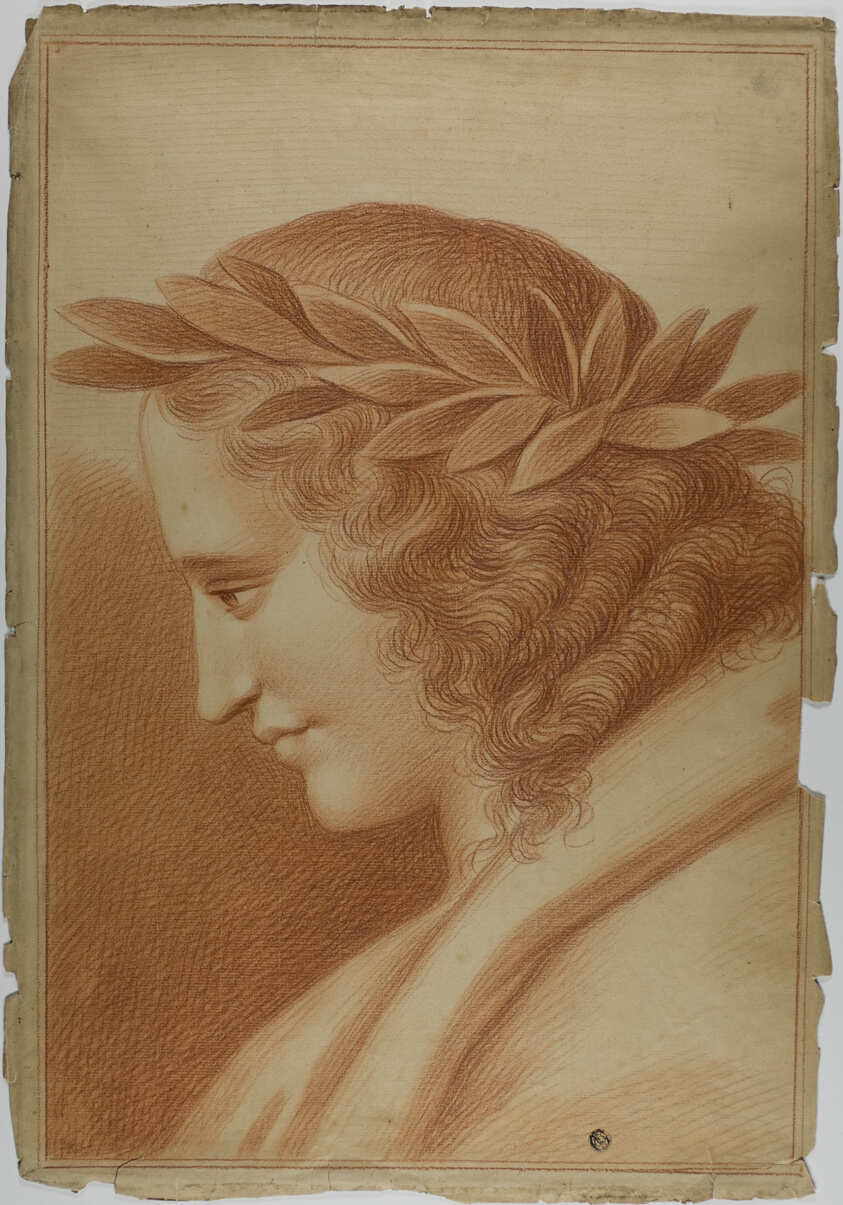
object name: Drawing and Watercolor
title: Poet Crowned with Laurel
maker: After Raffaello Sanzio, called Raphael; Italian, 1483-1520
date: 18th century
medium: Red chalk with stumping on cream laid paper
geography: Italy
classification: chalk; drawings (visual works); prints and drawing